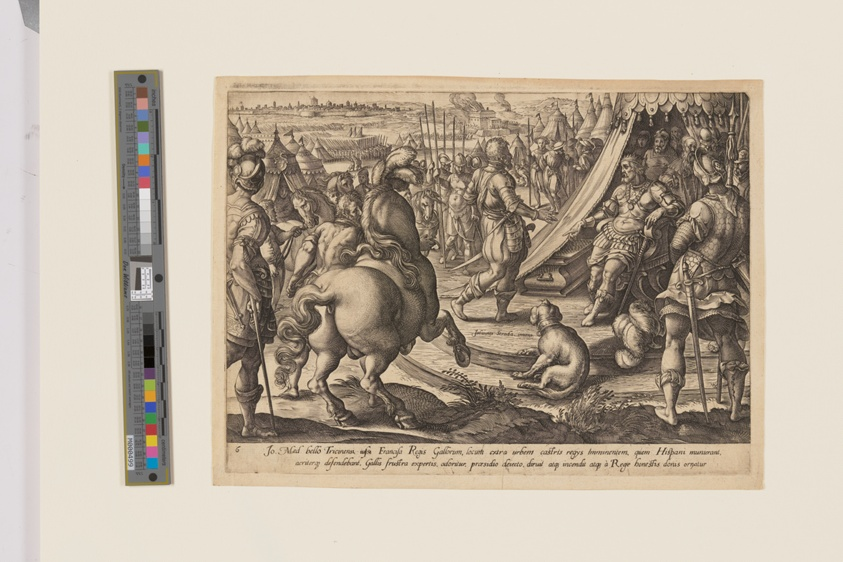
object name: Print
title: Giovanni de’ Medici before Francis I, plate 6 from The History of Giovanni de’ Medici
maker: Hendrick Goltzius (Dutch, 1558–1617); after Jan van der Straet (Flemich, 1523–1605); published by Philip Galle (Flemish, 1537–1612)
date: c. 1578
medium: Engraving on ivory laid paper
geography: Netherlands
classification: engraving; paper; print; prints and drawing